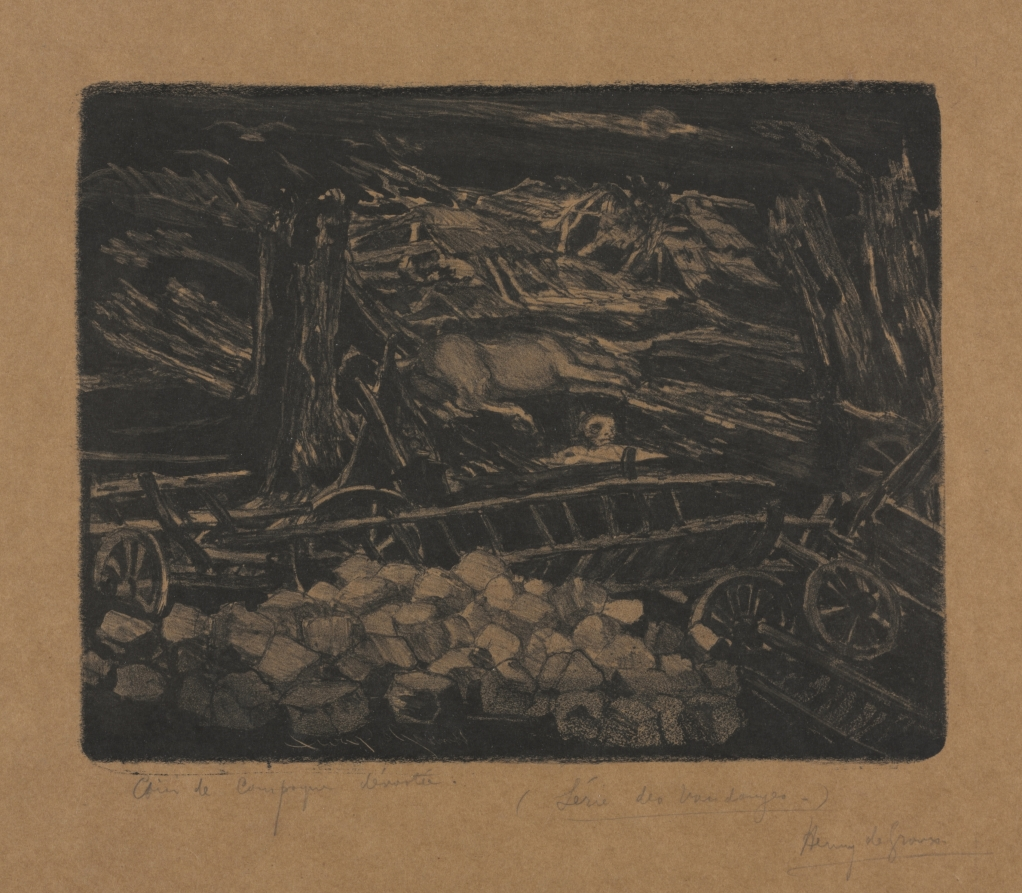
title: The Vintages!: Place of Devestation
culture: Belgium, 19th century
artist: Henri de Groux (Belgian, 1867–1930)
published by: Proof from an unpublished suite of lithographs intended to be published by L'Estampe Originale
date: 1894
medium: lithograph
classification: Print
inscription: lower right margin, in graphite: Henri De Groux; lower left margin corner, in graphite: Coin de Campagne devestée. (Serie des Vendages)